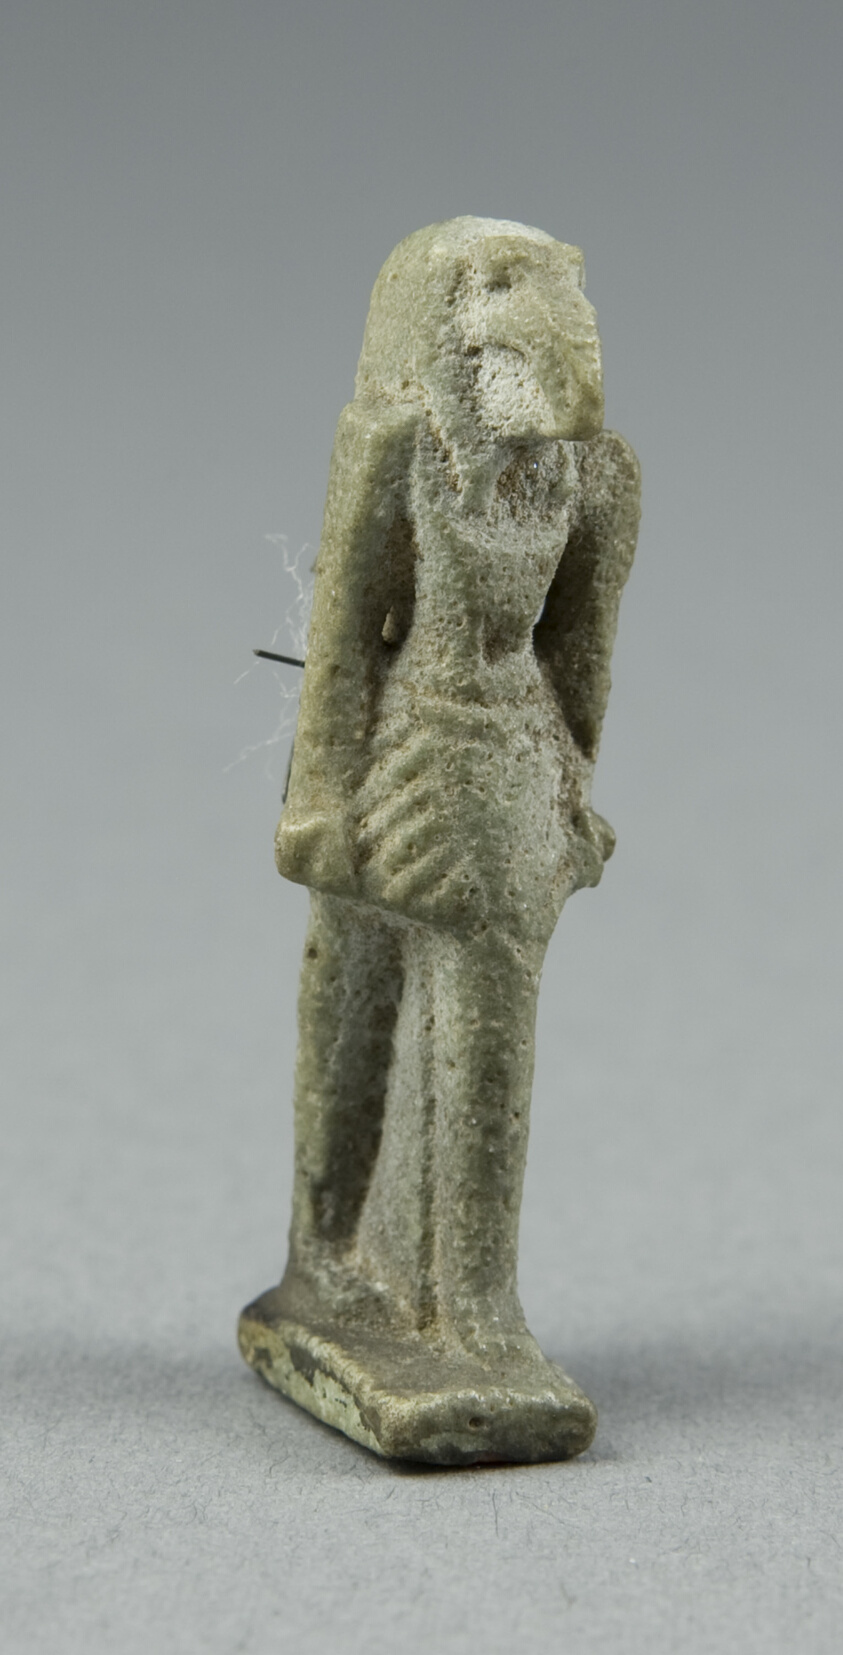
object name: Costume and Accessories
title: Amulet of the God Thoth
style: egyptian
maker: Egyptian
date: Late Period, Dynasties 26–31 (664–332 BCE)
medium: Faience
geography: Egypt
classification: amulet; jewelry; ceramics; ancient art; costume; faïence (composite material)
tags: gods (deities)